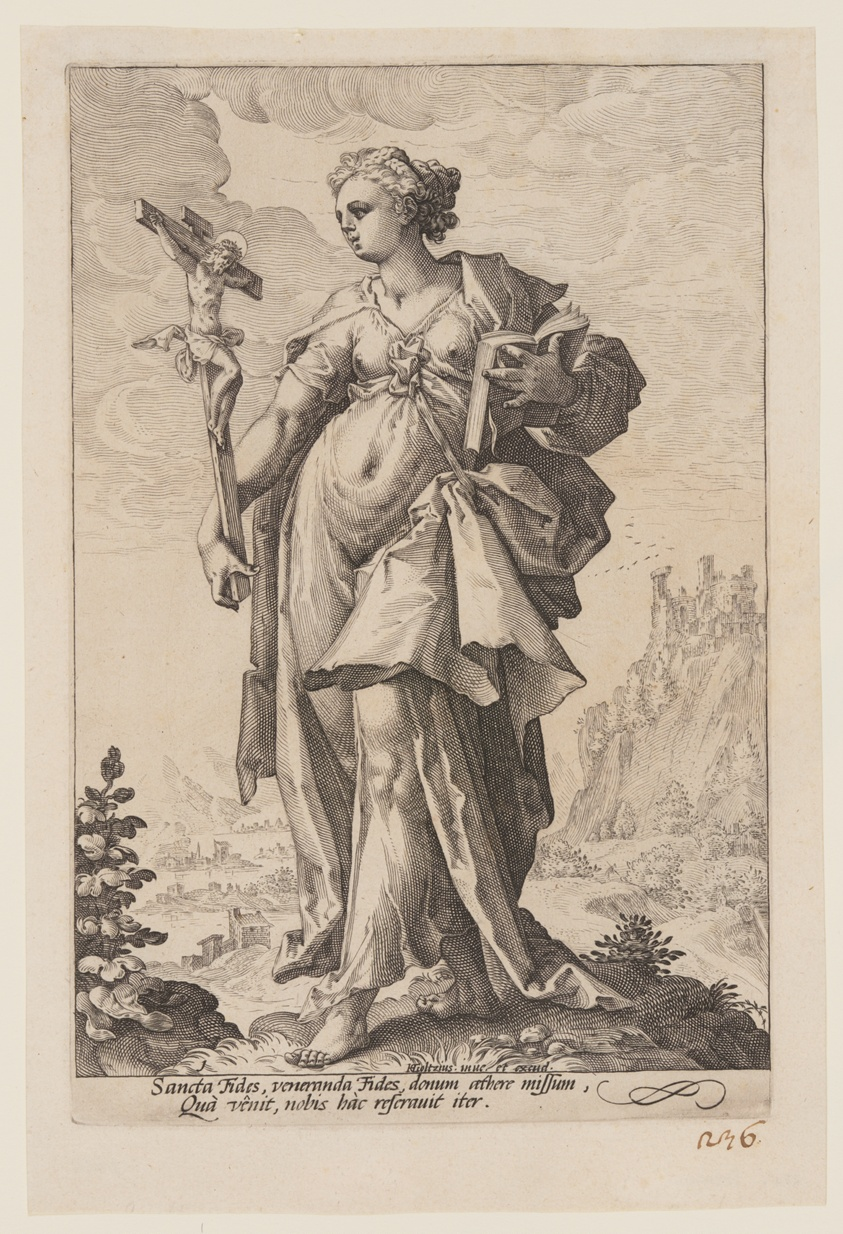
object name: Print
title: Faith, from The Virtues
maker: Jacob Matham (Dutch, 1571–1631); after Hendrick Goltzius (Dutch, 1558–1617)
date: c. 1593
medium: Engraving on ivory laid paper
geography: Netherlands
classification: engraving; paper; print; prints and drawing